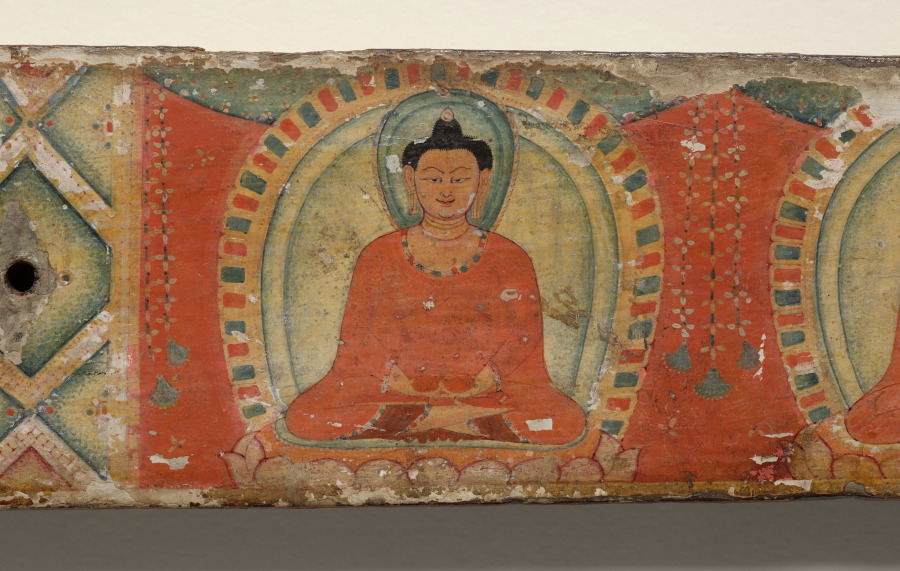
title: Ratnasambhava, Akshobhya, Vairochana with attendants, Amitabha, and Amoghasiddhi, Top cover, from a Manuscript of the Perfection of Wisdom in Eight Thousand Lines (Ashtasahasrika Prajnaparamita-sutra)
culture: Eastern India, Bihar, Vikramashila Monastery. Paintings: Nepal, Kathmandu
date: Sunday, September 14, 1119 (year 239 of the Newar Samvat in the month of Ashvina)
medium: Covers: Gum tempera, colors, and paper on wood; pages: gum tempera and ink on palm leaves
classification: Painting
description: The inner side of the top cover is fully painted with images of the Five Cosmic Buddhas of Esoteric Buddhism. Each one has a different color, meaningful hand gesture, and is associated with a spatial direction. In the center is the white Vairochana holding his hands in the enlightenment mudra. On either side of the binding holes are the other four Cosmic Buddhas Akshobyha (blue, earth-touching mudra, east) and Amitabha (red, meditation mudra, west), and on the ends are Ratnasambhava (gold, gift-giving mudra, south) and Amoghasiddhi (green, fear-not mudra, north). The top side is covered with ritual materials indicating that this book was once an object of worship.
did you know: The Five Tathagatas could be the source of visions that would help Buddhist practitioners on the path to enlightenment.